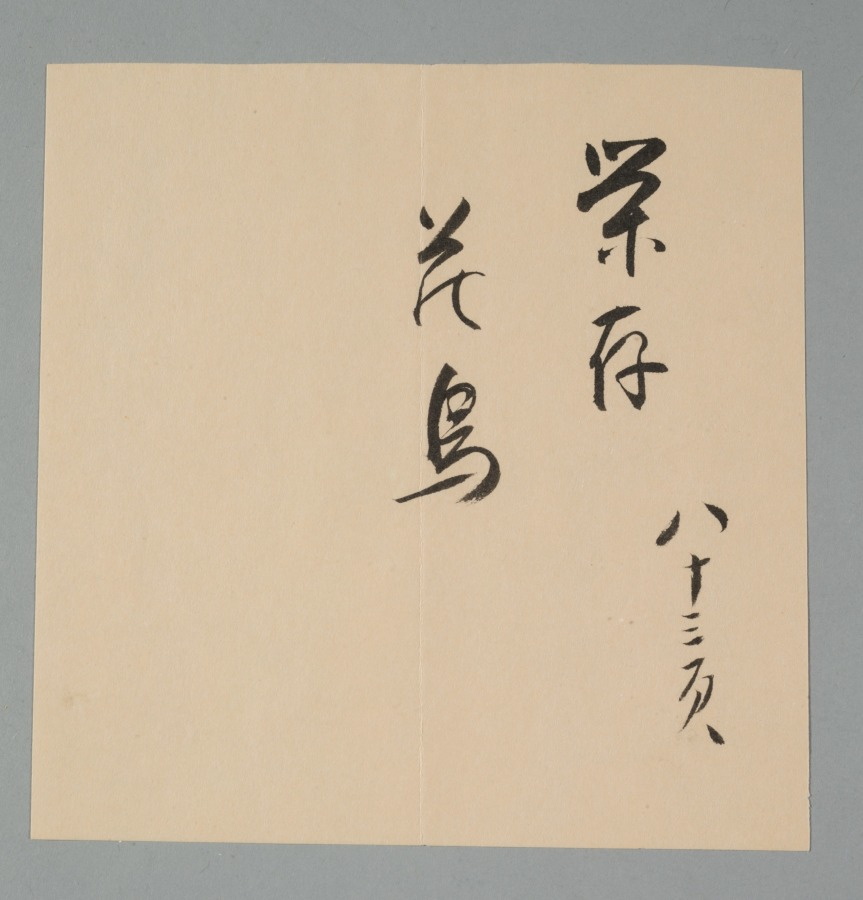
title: Wagtails and Narcissus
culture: Japan, Muromachi period (1392–1573)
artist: Eison (Japanese)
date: mid-1500s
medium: hanging scroll; ink on paper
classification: Painting